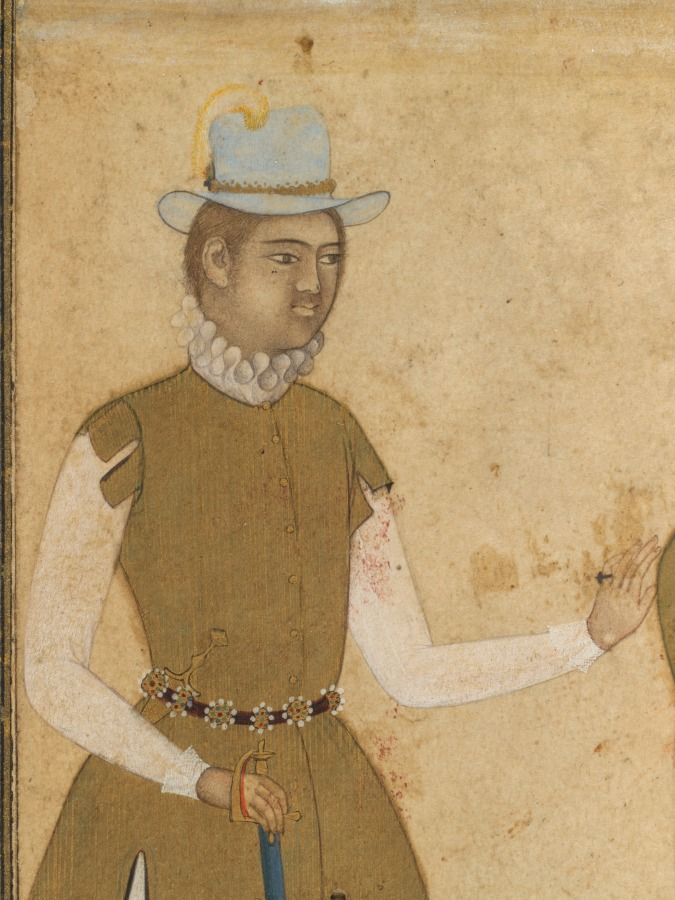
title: A European Couple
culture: India, Bijapur, Deccan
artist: attributed to Ali Riza, the "Bodleian Painter" (Indian)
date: c. 1610–27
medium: Gum tempera and gold on paper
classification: Painting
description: This painting of a European couple seems to be based on close observation and a desire to record the appearance of foreigners. The artist has accurately depicted the 17th-century European clothing in great detail, particularly in the collar ruffs, linen cuffs, and ornate jewelry worn by both figures.